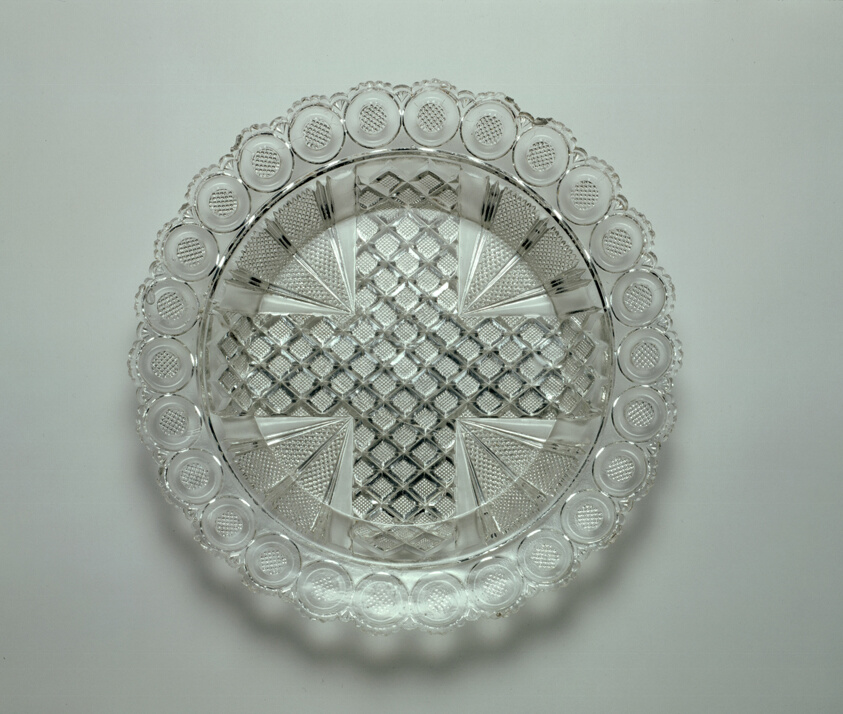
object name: Glass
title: Bowl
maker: Boston and Sandwich Glass Company; American, 1825–1888; New England Glass Company; American, 1818–1888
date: before 1830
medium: Pressed glass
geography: Sandwich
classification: bowl; glass; american decorative arts; american arts; decorative arts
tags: dining, drinking